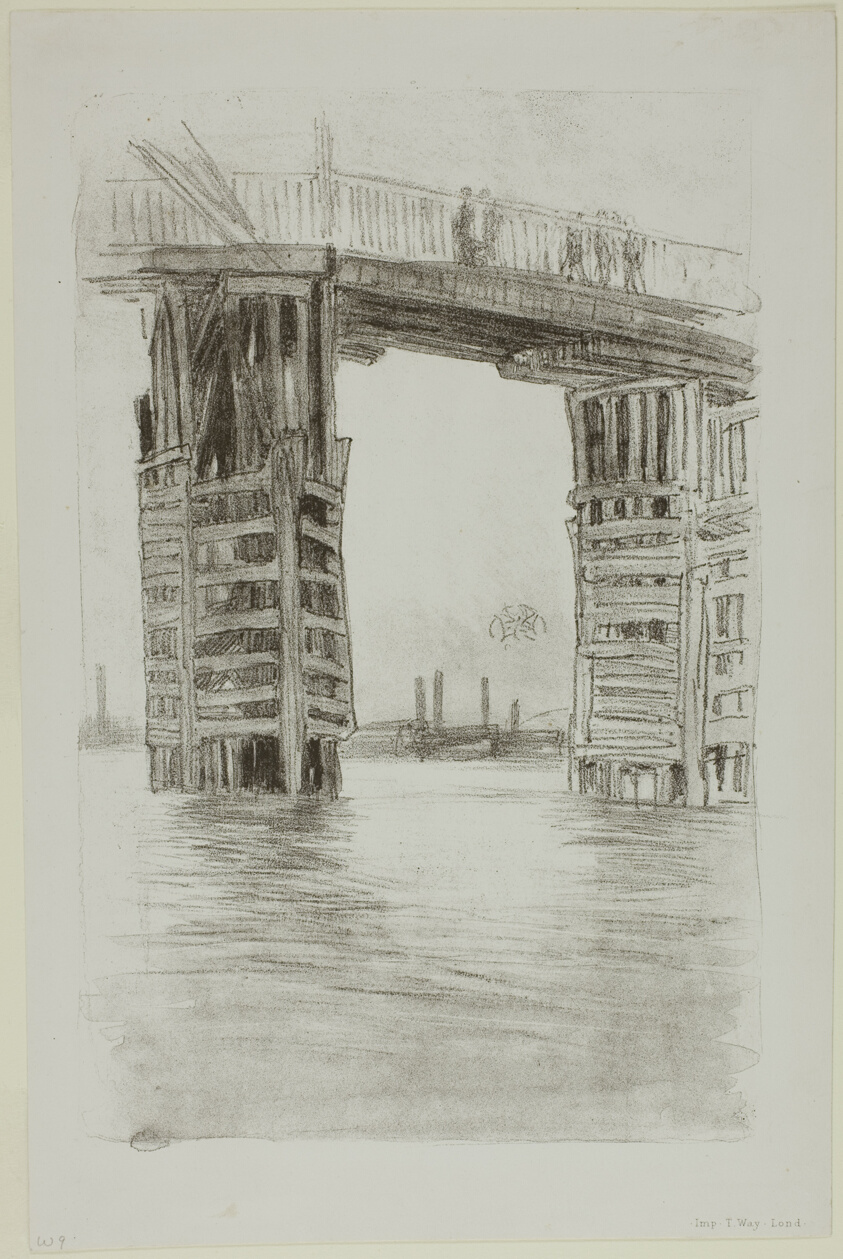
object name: Print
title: The Tall Bridge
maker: James McNeill Whistler (American, 1834-1903)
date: 1878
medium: Lithotint, in black ink, with scraping, on ivory plate paper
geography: United States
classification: lithotint; lithograph; print; prints and drawing; paper